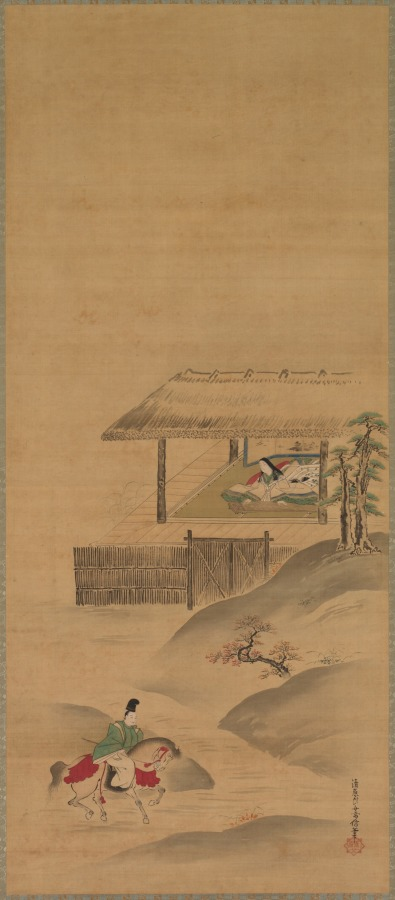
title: Minamoto no Nakakuni Visits Lady Kogō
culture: Japan, Edo period (1615–1868)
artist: Kiyohara Yukinobu (Japanese, 1643–1682)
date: late 1600s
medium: Triptych of hanging scrolls; ink and color on silk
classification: Painting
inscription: 款記「清原氏女雪信筆」/「清原女」朱文八角印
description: An aristocrat rides up a path to a residence where a woman plays a koto, a stringed instrument. The central composition is flanked on the right by a day-lit spring scene, and on the left by a nocturnal autumnal scene. The triptych presents an episode from The Tale of the Heike in which Minamoto no Nakakuni is sent by the emperor to look for Lady Kogō.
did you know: The Tale of the Heike chronicles the conflict between the Taira (Heike) and Minamoto (Genji) families in the late 12th century.